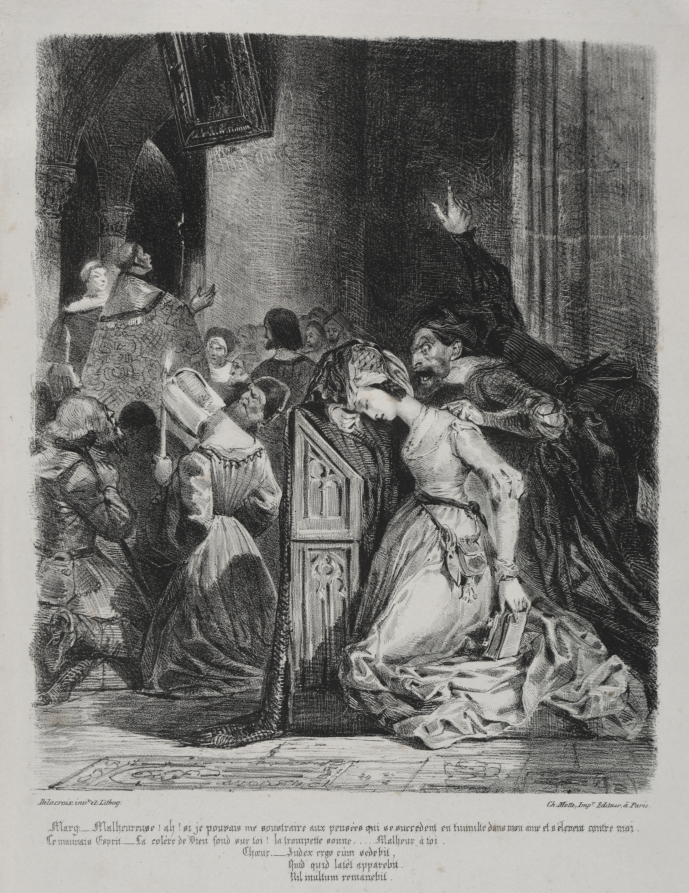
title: Illustrations for Faust: Marguerite at church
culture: France, 19th century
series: Faust: Tragédie de M. de Goethe, translated into French by Albert Stapfer.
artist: Eugène Delacroix (French, 1798–1863)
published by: Chez Ch. Motte, Éditeur, distributed by Chez Sautelet, Libraire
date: 1828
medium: lithograph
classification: Print